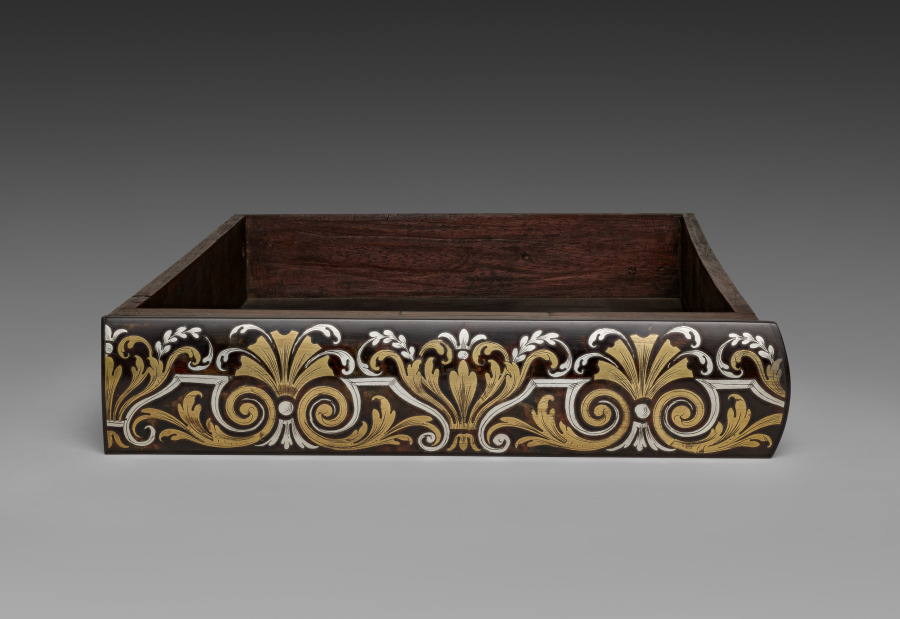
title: Drawer for Cabinet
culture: France, late 17th Century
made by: André-Charles Boulle (French, 1642–1732)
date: c. 1690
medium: ebony, marquetry in metal and tortoiseshell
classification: Furniture and woodwork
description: Appointed cabinetmaker to King Louis XIV in 1672, André-Charles Boulle became a master of furniture making in France during the late 1600s until his death in 1732. Known primarily for his use of marquetry, in which metal patterns are inlaid into tortoiseshell then applied within the veneered surface of the furniture, Boulle established a level of quality and craftsmanship few others could achieve. As a result, his work found favor at the royal court and among other aristocrats and diplomats eager to impress the king. The inclusion of a medallion depicting Louis XIV within the bronze decoration of this chest would have identified the owner with the royal court. Often exhibiting stout architectural proportions with elegant groups of inlaid motifs such as the parrot on the central panel of this chest, Boulle’s designs are an example of the intellectual fashion for contrasting ideas, materials, and motifs.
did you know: Originally designed to sit atop an elaborate tall stand, this chest was likely altered in the late 1700s to reduce its scale and height.